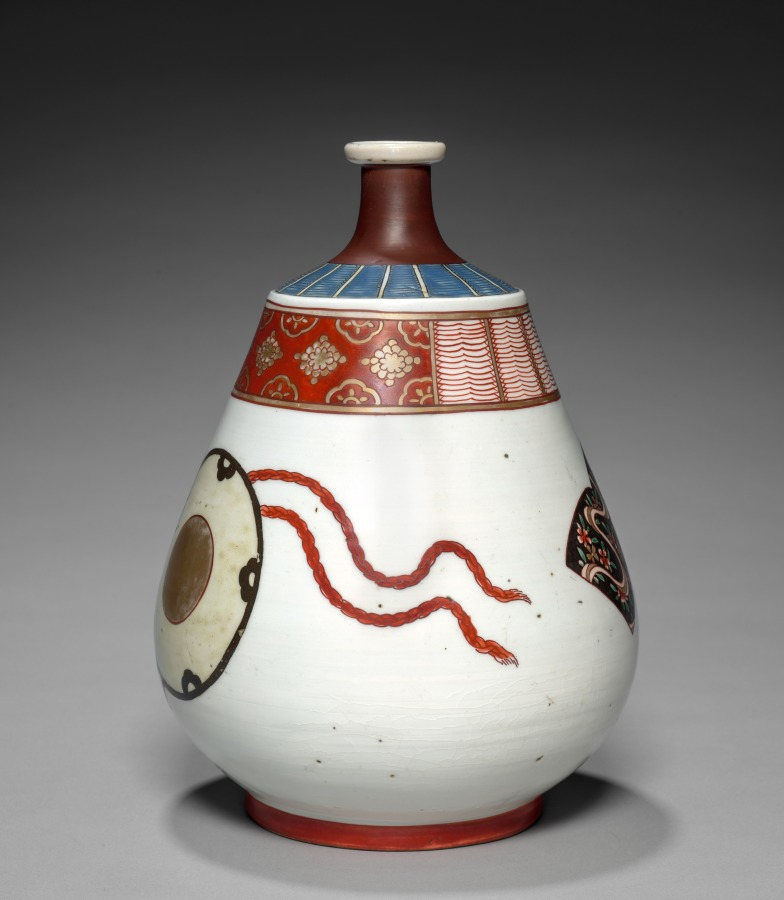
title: Bottle-Flask with Drums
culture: Japan, Edo period (1615–1868)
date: 1700s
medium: porcelain with overglaze color enamel (Hizen ware, Arita type, Imari style)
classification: Ceramic